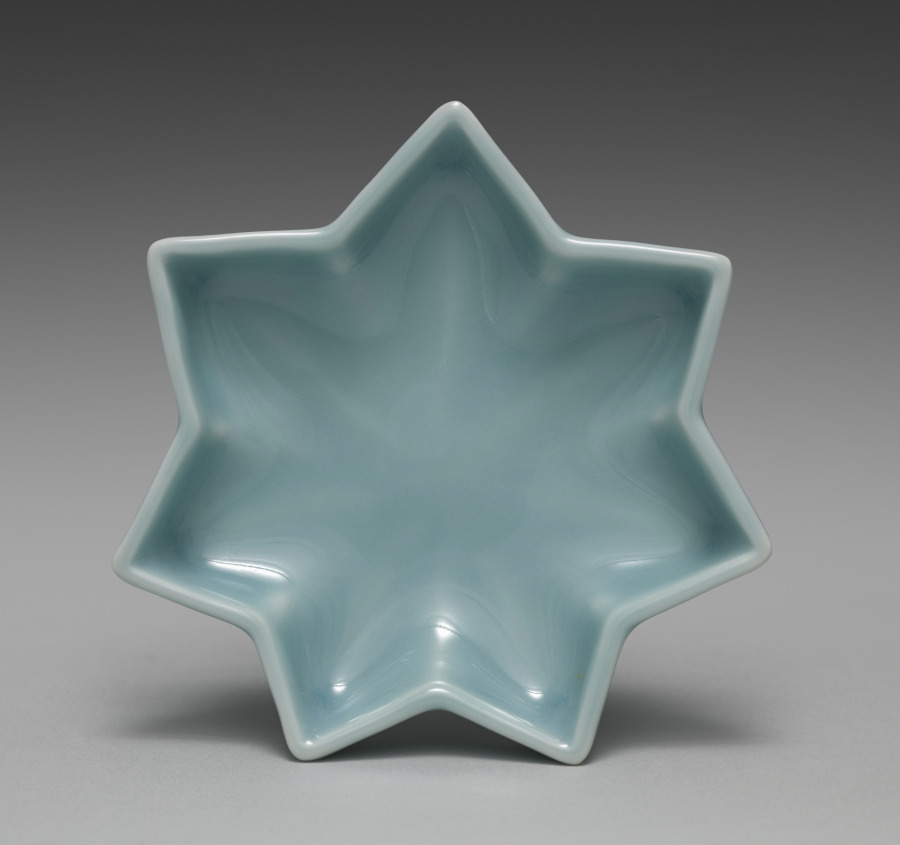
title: Saucer from Maple Leaf-Shaped Saucers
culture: Japan, Meiji period (1868–1912)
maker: Seifū Yohei III (Japanese, 1851–1914)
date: 1893–1914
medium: One of five dishes from a set of ten; porcelain with blue glaze and molded design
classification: Ceramic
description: These maple leaf–shaped saucers, like Yohei III's five shell saucers CMA 2022.188, have a long, horizontal box with a separate compartment for each piece. Now a set of five, these dishes were originally a set of ten, stored in two boxes of five each. From their housings, which accommodate differing numbers of objects, one can hypothesize that while some items created by the Seifu studio were intended to be acquired in larger sets, and thus were perhaps made to order, others, like these, may have been items to be purchased of the shelf in set quantities that allowed clients flexibility in scale. The box for these five saucers describes them as “heavenly blue[–glazed] porcelain” (tenseiji). The veins of the leaves are slightly raised in the clay so that the glaze pools around them and they stand out as white where the glaze thins. There are longer lines at the points of the leaves and shorter ones following the wall of each indentation so that the design has both a horizontal and a subtle vertical dimension.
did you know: These saucers shaped like maple leaves show Seifū Yohei III’s “heavenly blue glaze.”